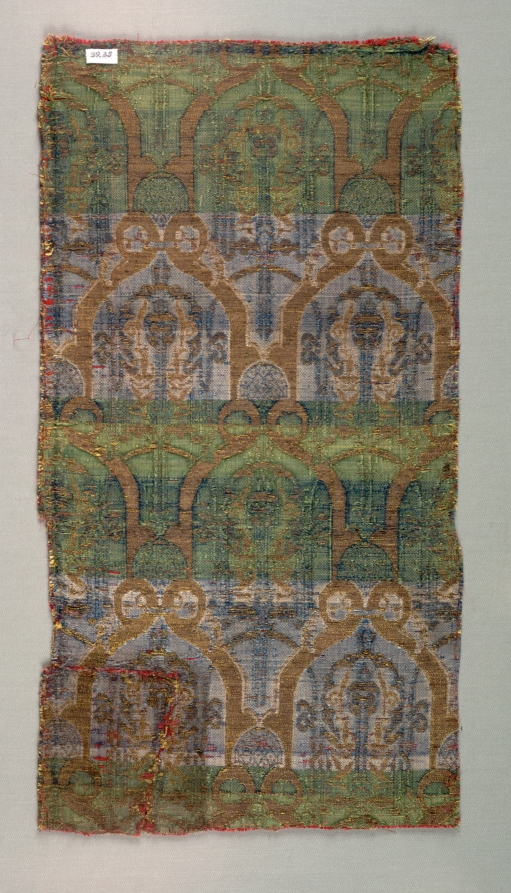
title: Fragment with palmette arches with Alhambra wall pattern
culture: Spain, Granada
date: 1300s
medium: Silk and gilt-metal thread: lampas weave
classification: Textile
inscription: horizontal rows of staggered arch-like forms enclose knotted and interlaced Kufic inscriptions: "Success."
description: This rare, gold-thread silk displays a sophisticated pattern that also decorates the stucco walls of the Alhambra, the imperial palace in Granada. Three superimposed designs form the harmonious pattern on the golden ground. Split-palmette leaves in ivory or green silk form staggered arches displaying a crimson text, Good fortune, written in angular Arabic script with extended strokes that create secondary symmetrical arches. Deep blue palmette leaves create the third level of decoration. The interior walls of the Alhambra would have shimmered with these warm, patterned textiles.